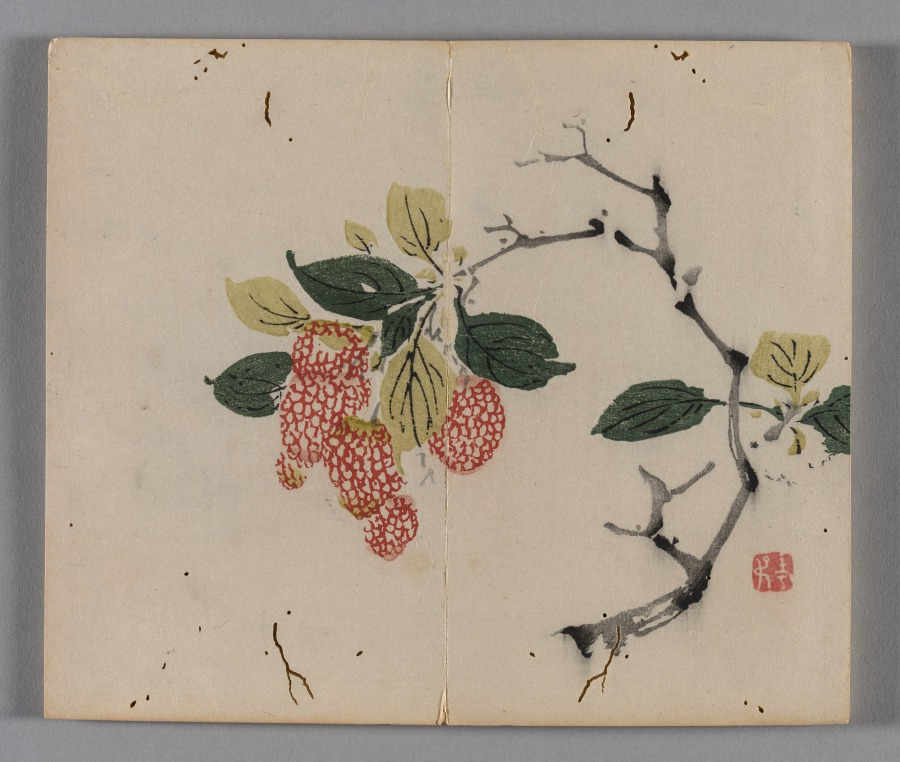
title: Ten Bamboo Studio Collection of Calligraphy and Painting: Miscellaneous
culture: China, Qing dynasty (1644-1911)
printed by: Hu Zhengyan (Chinese, c. 1584–1674)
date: 1633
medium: Woodblock-printed book; ink and colors on paper; first edition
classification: Print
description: Color printing reached a level of perfection in the early 1600s, as seen in this Ten Bamboo Studio Collection of Calligraphy and Painting and the Mustard Seed Garden Manual of Painting (printed 1679 and 1701). The painterly quality, precision in registering (aligning) the woodblocks, and harmonious colors made them the most successful color print editions in Chinese history. Both editions were printed and compiled in Nanjing, spread nationwide, and had a great impact on the arts in Japan and Korea.